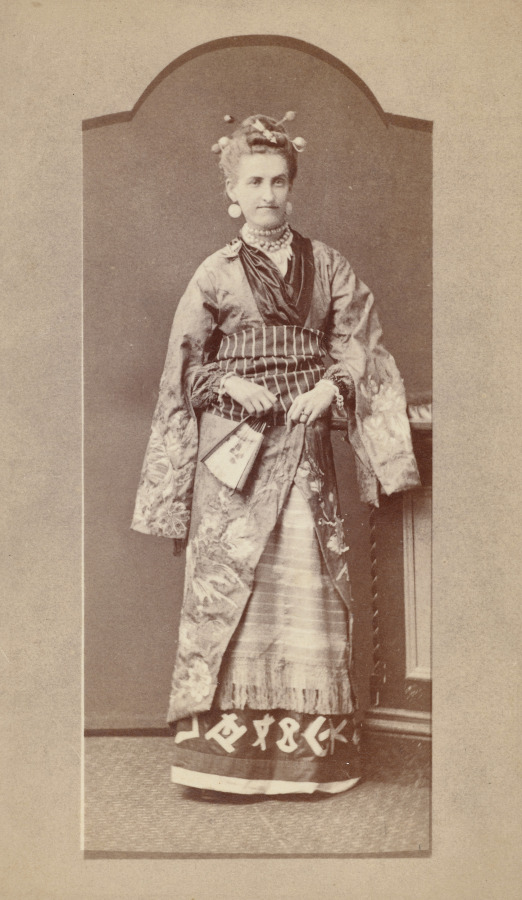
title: Untitled (white woman in Japanese kimono with fan)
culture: Unknown, 19th century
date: 1890s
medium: gelatin silver print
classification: Photograph